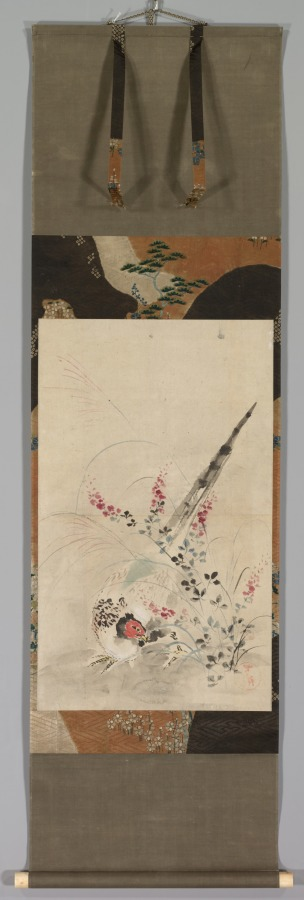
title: Pheasant and Grasses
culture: Japan, Edo period (1615–1868)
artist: attributed to Ogata Kōrin (Japanese, 1658–1716)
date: late 1600s–early 1700s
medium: hanging scroll; ink and color on paper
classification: Painting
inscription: two seals of artist, lower right.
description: Korin was a founder of the Rimpa (decorative) school of painting and was a keen observer of nature. The pheasant is often associated with autumn.